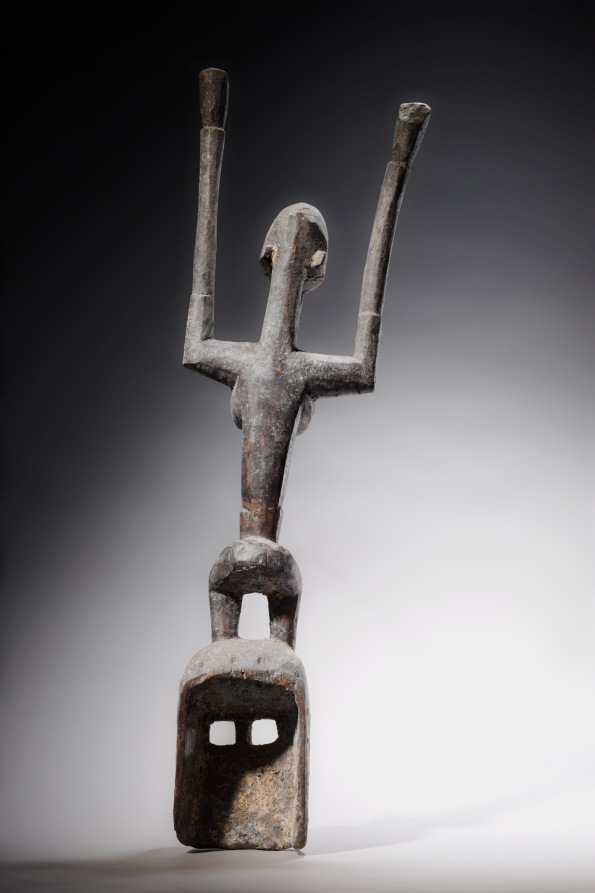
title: Face Mask with Female Figure (satimbe)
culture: Africa, West Africa, Mali, Dogon-style blacksmith-carver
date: early to mid-1900s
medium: Wood and organic materials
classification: Mask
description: Dogon masks are worn at the end-of-mourning ceremonies called dama. The masks incarnate ancestors, which can be human, animal, or vegetal. The female figure with raised arms topping this example represents the mythical character Yasigine, who played a key role in the very first sigi celebration. Held every 60 years, the sigi ceremony commemorates the arrival of death.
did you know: This mask is one of several hundred that may perform at the ceremony called dama.